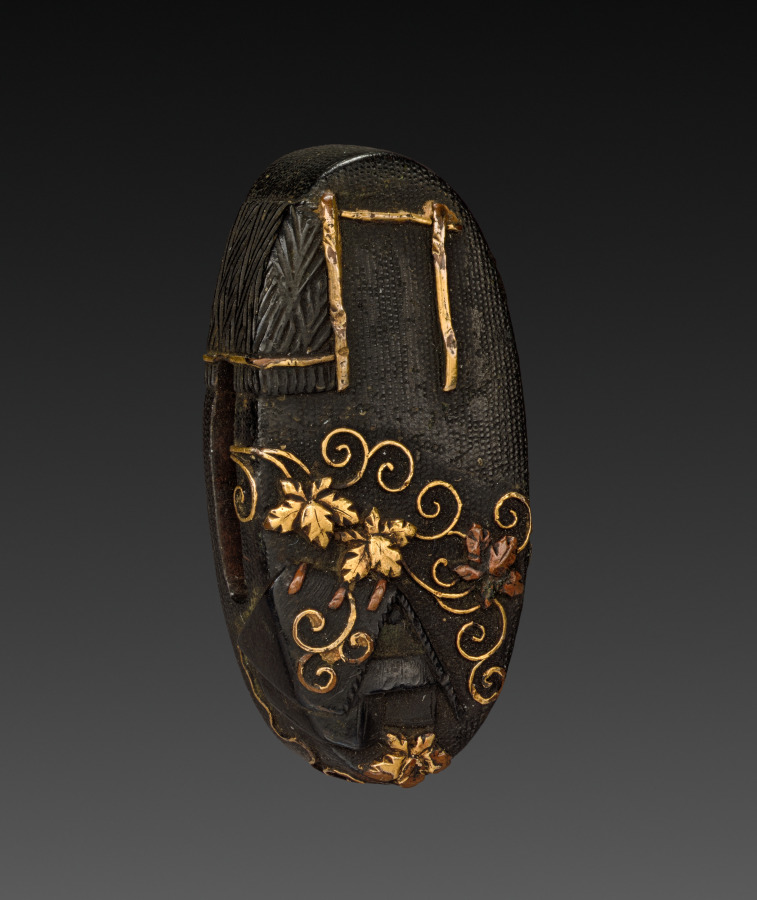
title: Sword-Hilt Pommel (Kashira)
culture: Japan, Edo period (1615–1868)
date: 1700–1850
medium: shakudo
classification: Arms and Armor